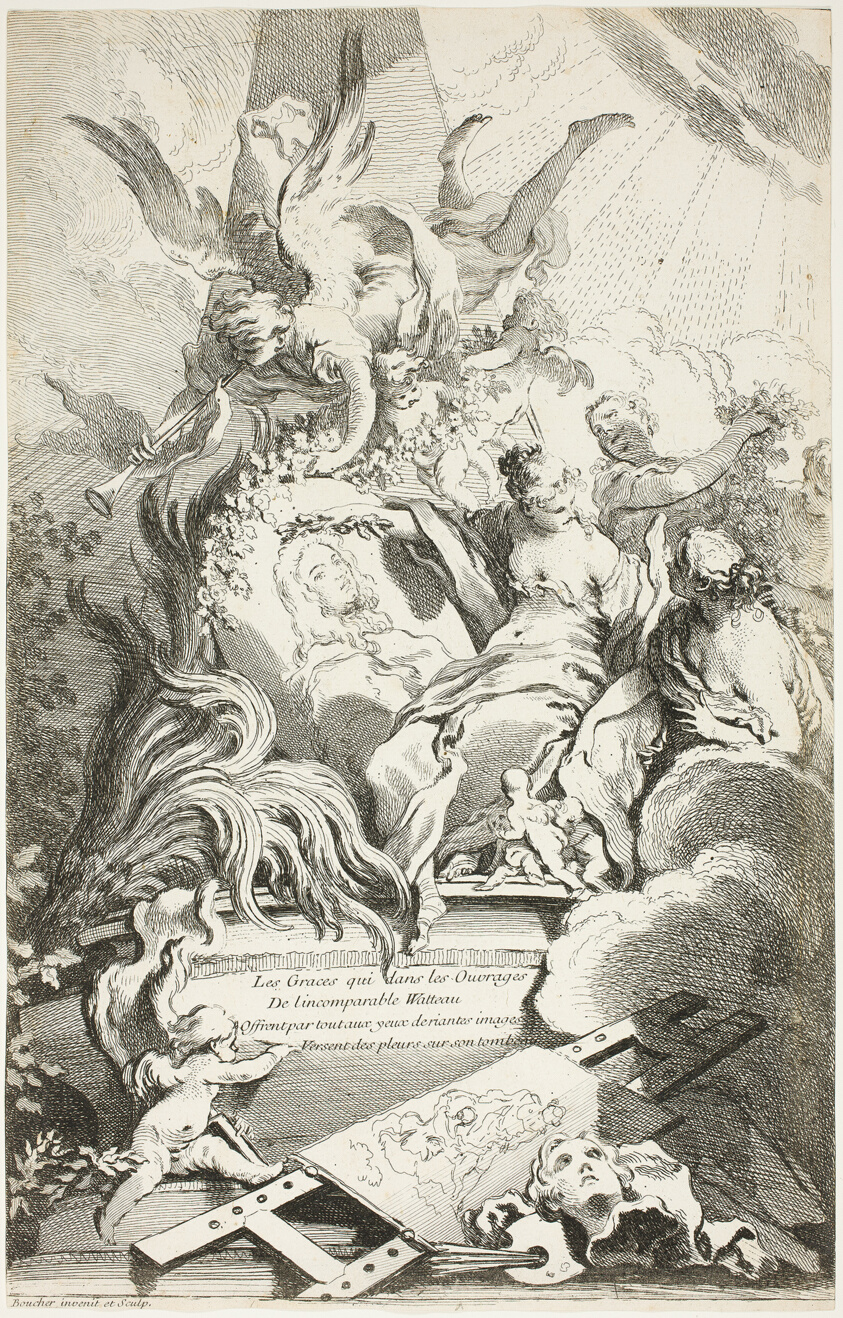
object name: Print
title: The Graces on the Tomb of Watteau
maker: François Boucher (French, 1703-1770); printed by Gabriel Huquier (French, 18th century)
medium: Etching on off-white laid paper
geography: France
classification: etching; print; prints and drawing